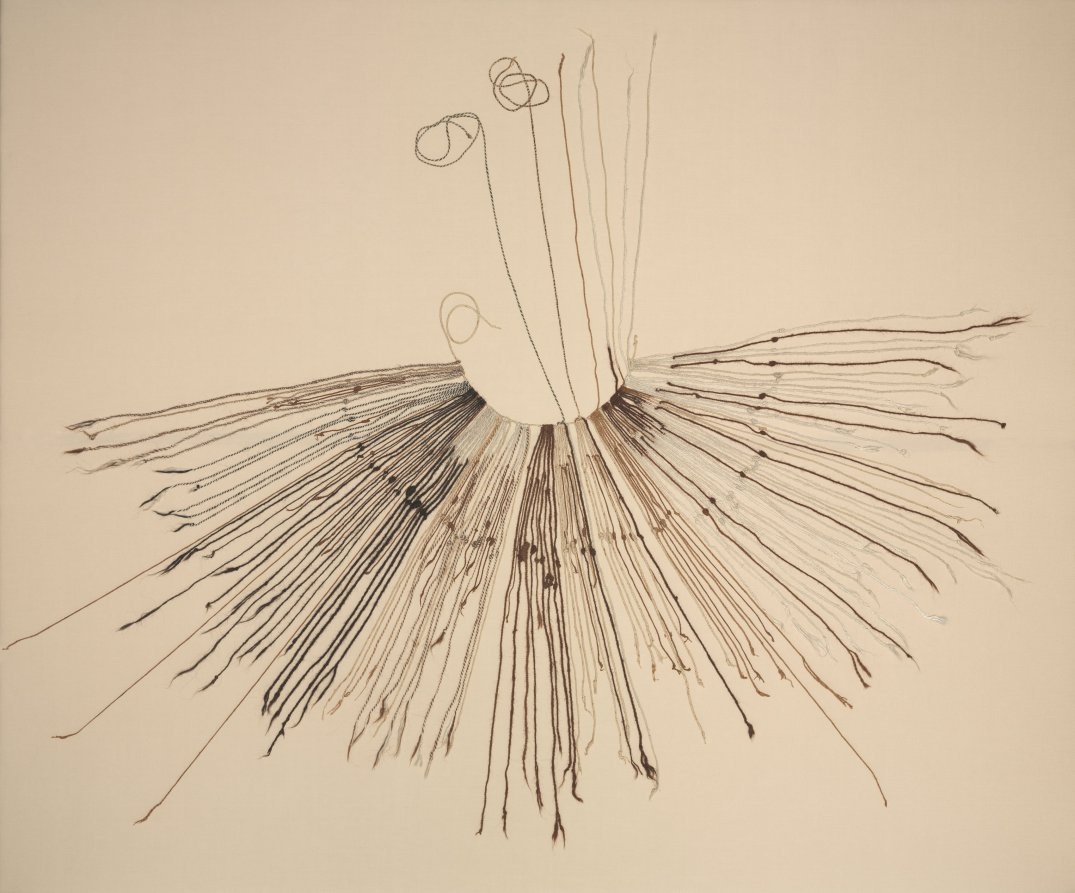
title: Inka Khipu (Fiber Recording Device)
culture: Peru, Inca Period, 15th-16th Century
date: c. 1400–1532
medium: cords, knotted and twisted; cotton and wool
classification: Miscellaneous